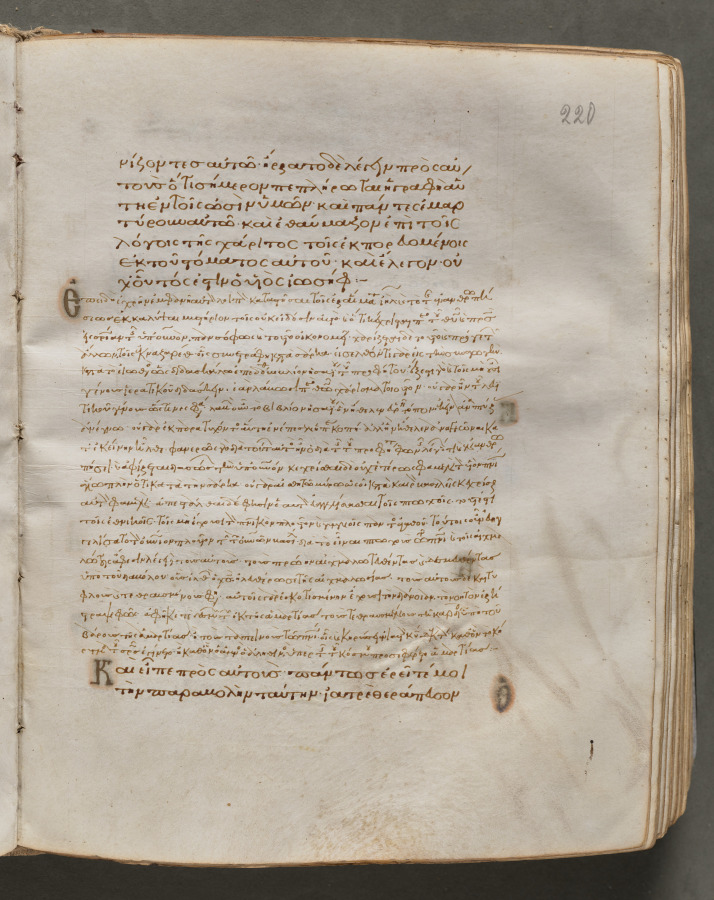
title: Text, folio 220 (recto), from a Gospel Book with Commentaries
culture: Byzantium, Constantinople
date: c. 1000–1100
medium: ink, tempera, and gold on vellum; leather binding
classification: Bound Volume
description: Each of the four gospels in this book opens on a page with brilliantly illuminated borders depicting the author of the text as well as birds-principally peacocks, symbols of the immortality of the soul-and fountains, representing the fountain of life and the salvation of the soul. This volume consists of 428 leaves with texts in Greek. Its level of sophistication suggests that it was probably written and decorated in a monastery in Constantinople.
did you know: Gospel Books were carried in procession through Byzantine churches.